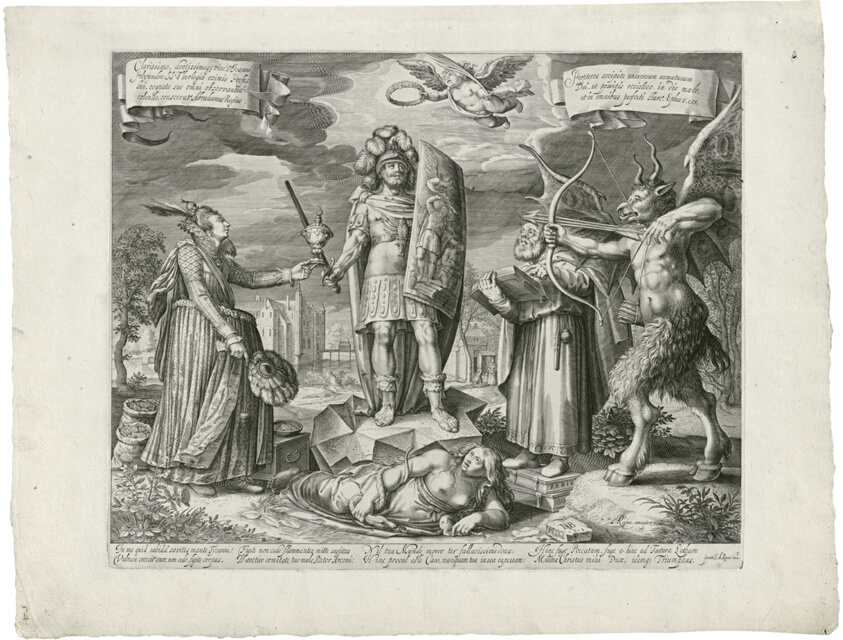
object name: Print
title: The Christian Soldier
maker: Pieter Serwouters (Flemish, 1586–1657); after David Vinckboons (Flemish, 1576–c. 1632)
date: 1614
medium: Engraving in black on cream laid paper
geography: Flanders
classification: prints and drawing; paper; etching; print